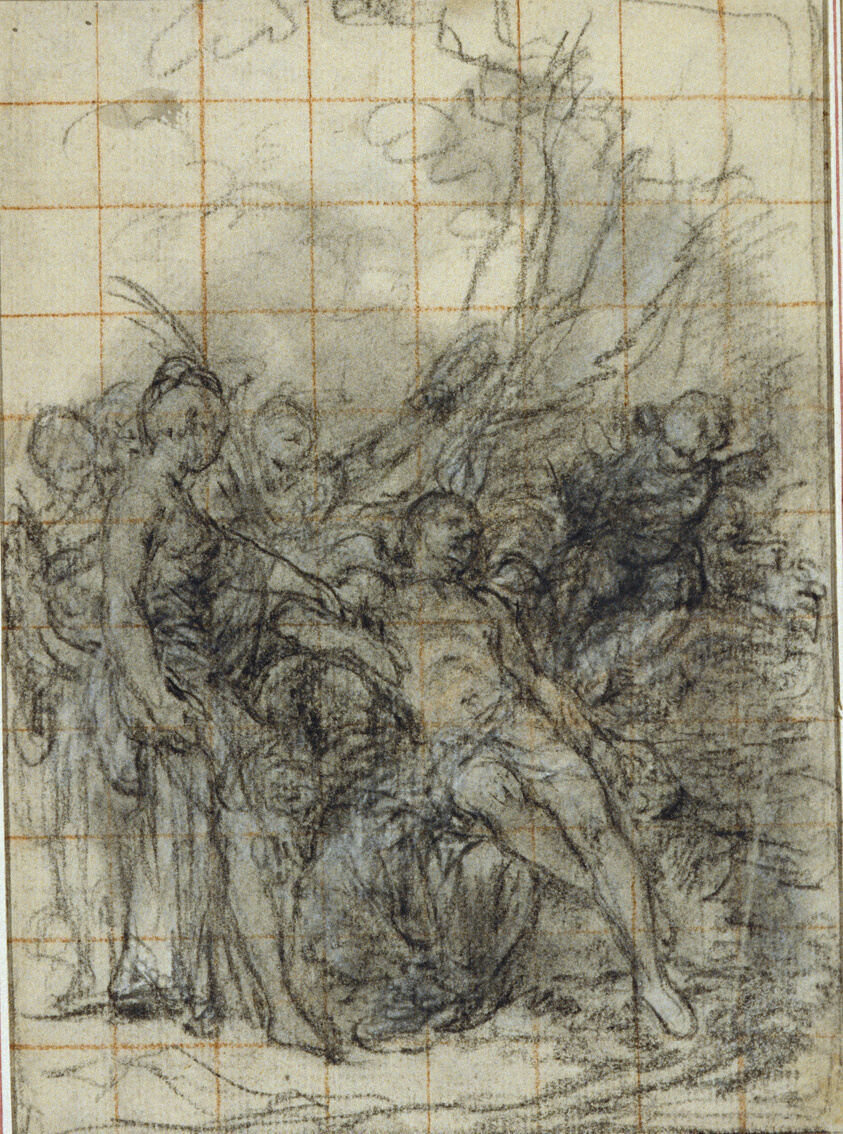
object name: Drawing and Watercolor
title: Death of Adonis (?)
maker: Hubert François Gravelot (French, 1699-1773)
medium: Black chalk with stumping, heightened with white chalk, squared in red chalk, on cream laid paper, laid down on ivory laid paper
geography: France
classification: chalk; drawings (visual works); prints and drawing